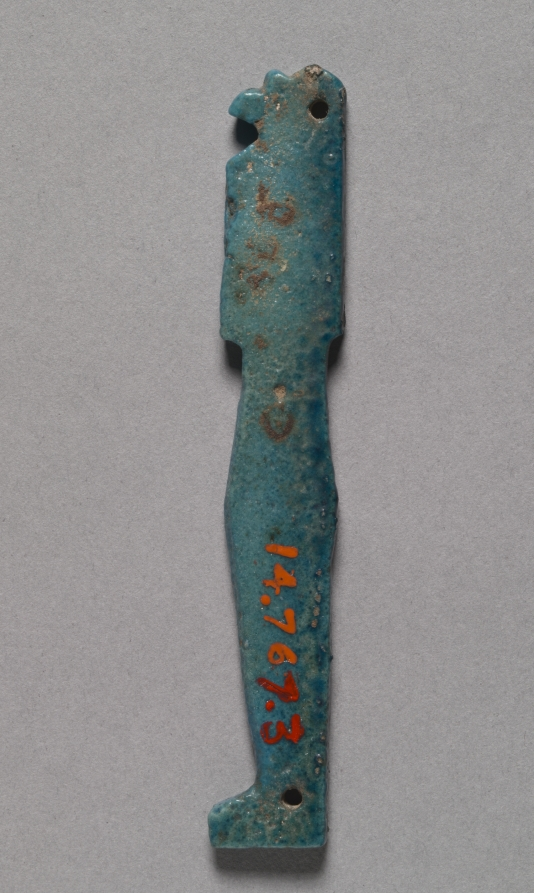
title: Son of Horus Amulet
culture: Egypt, Late period (715–332 BCE), Dynasty 26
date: 664–525 BCE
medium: bright turquoise faience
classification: Amulets